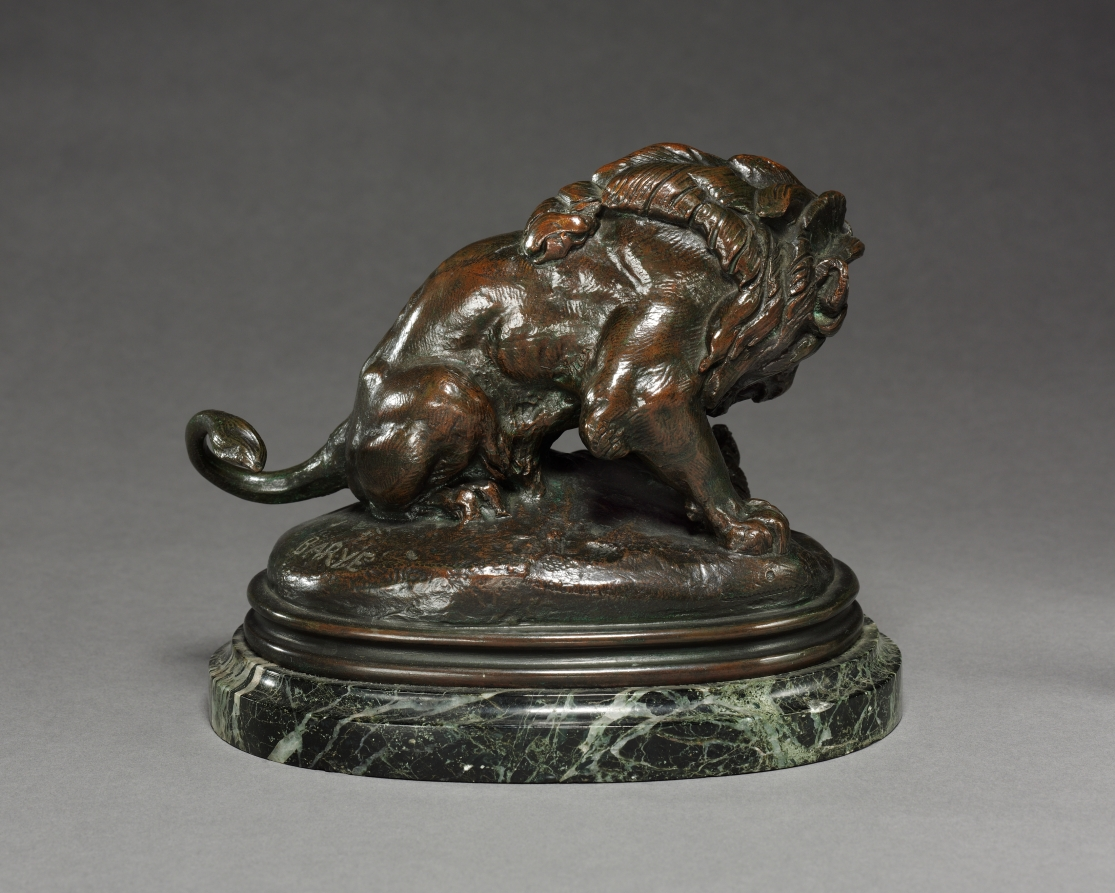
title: Lion and Serpent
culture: France, 19th century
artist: Antoine-Louis Barye (French, 1796–1875)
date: c. 1830 – 1875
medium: bronze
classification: Sculpture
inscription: Signed: "Barye"